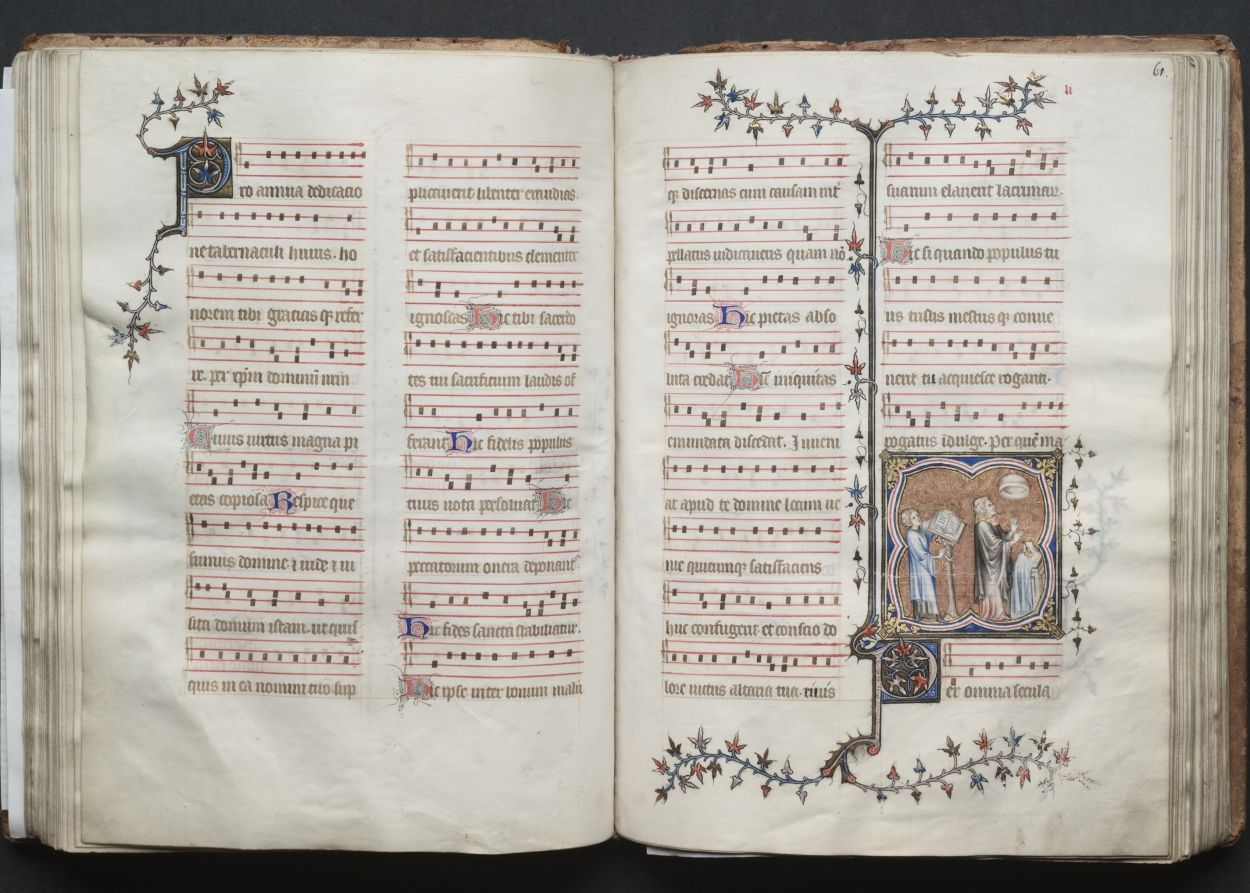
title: The Gotha Missal: Fol. 60v, Text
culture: France, Paris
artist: Master of the Boqueteaux (French)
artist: and Workshop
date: c. 1375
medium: ink, tempera, and gold on vellum; blind-tooled leather binding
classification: Bound Volume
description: The style and quality of this manuscript's decoration is typical of deluxe Parisian books made for aristocratic or royal patrons. Most of the book's decoration appears to be the work of the Master of the Boqueteaux, an artist active at the court of King Charles V (died 1380). His style was apparently shared by a number of book illuminators working in and around Paris. It is very possible that the Gotha Missal belonged to Charles V, but is not provable because the manuscript has no royal portraits and lacks a colophon. Given the book's magnificent decoration, however, it would seem that it was produced for a Valois prince, if not for the king himself. The manuscript receives its name from the German dukes of Gotha, its later owners.